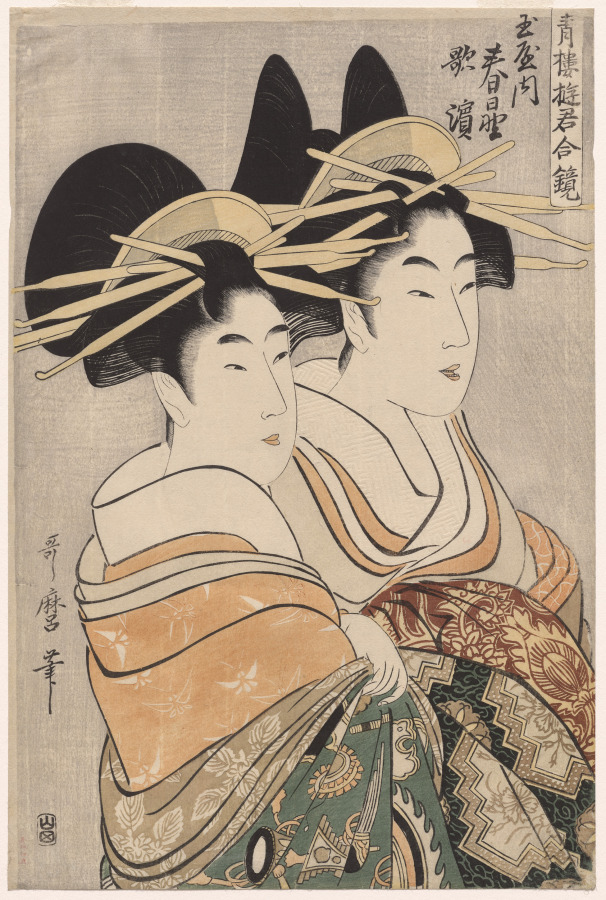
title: The Courtesans Kasugano and Utahama of Tamaya, from Courtesans of the Pleasure Quarters in Double Mirrors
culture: Japan, Edo period (1615–1868)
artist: Kitagawa Utamaro (Japanese, c. 1754–1806)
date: c. 1800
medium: color woodblock print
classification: Print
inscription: Signature: Utamaro hitsu. Publisher: Yamada.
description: Kitagawa Utamaro was well known for his close-up portraits that belonged to a genre, or category, of images called bijinga (pictures of beautiful people). This print is from a series that invites comparisons of the attractiveness of different figures. It features two sex workers from an establishment in the Yoshiwara district of Edo (now Tokyo).